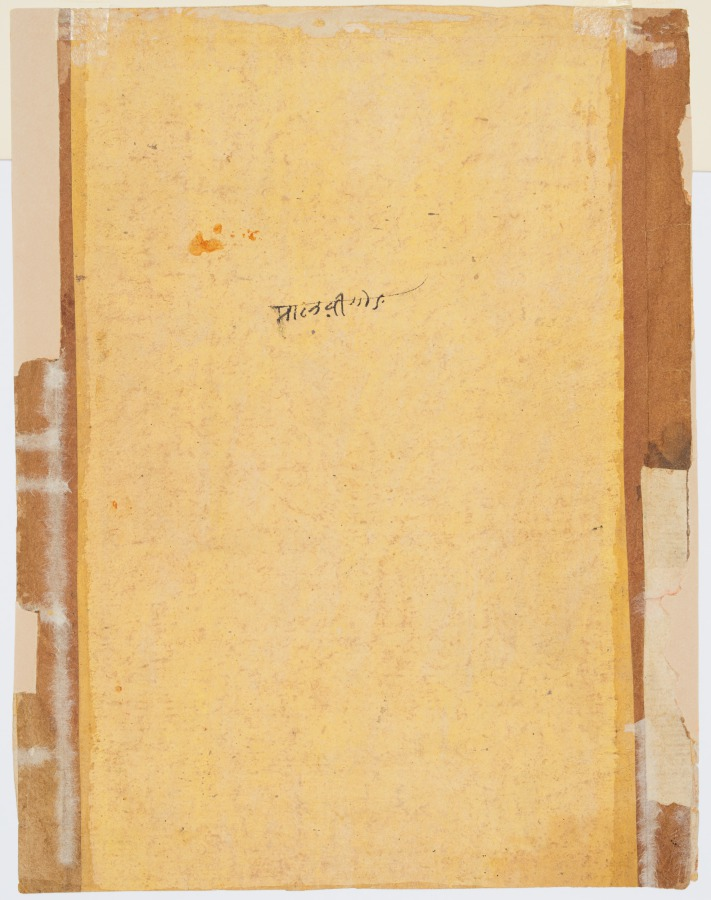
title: A Heroine and Her Paramour: Malavi Ragini, from a Ragamala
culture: Northwestern India, Rajasthan, Rajput Kingdom of Mewar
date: c. 1695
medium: gum tempera, ink, and gold on paper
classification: Painting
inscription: mālavī gauda’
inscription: 29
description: The painting is divided into two registers. The top register depicts a royal lady being attended by maidservants outside a bed chamber. The lower register depicts a noble walking with his consort, holding her tight and offering her a garland. The surrounding women dance and play music with an exuberance echoed in the vegetation.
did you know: The sun has a human face and gazes on the scene.